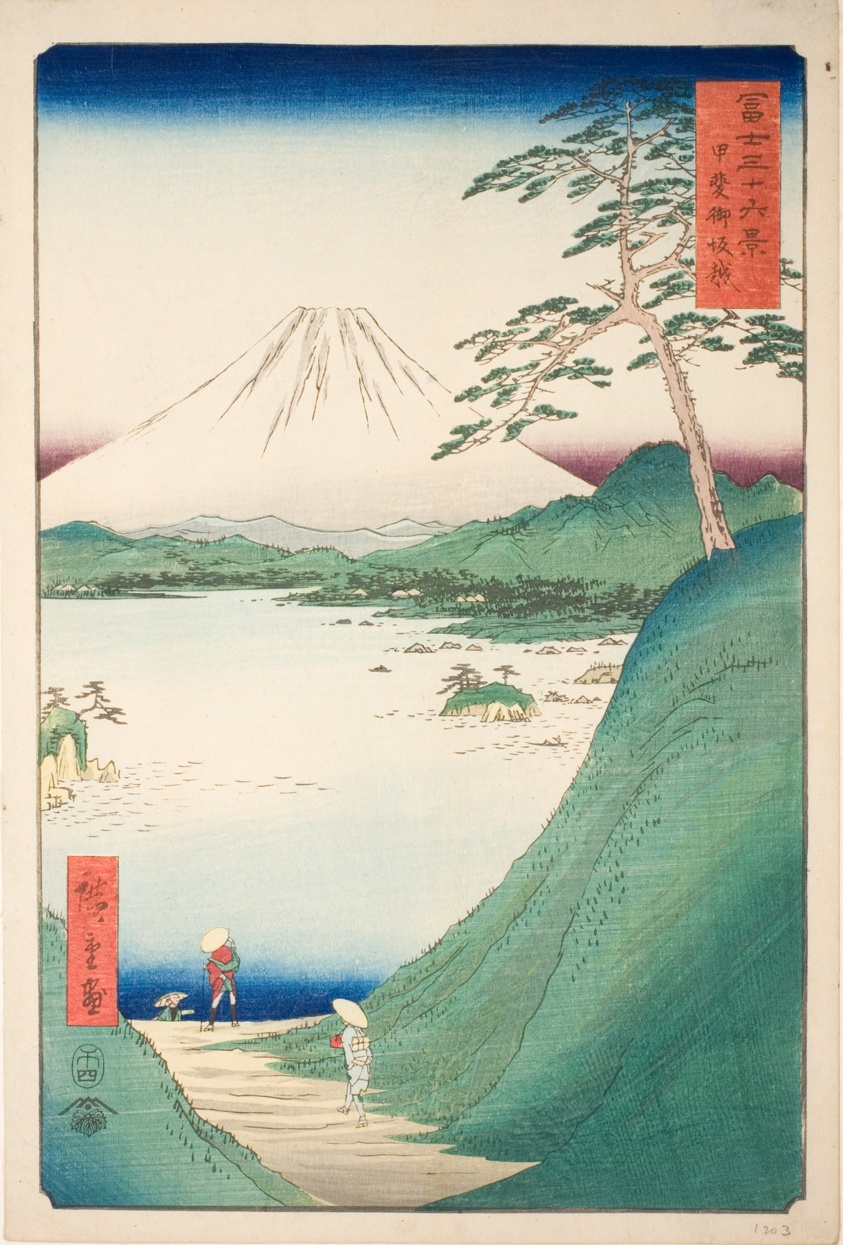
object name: Print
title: Misaka Pass in Kai Province (Kai Misakagoe), from the series "Thirty-six Views of Mount Fuji (Fuji sanjurokkei)"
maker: Utagawa Hiroshige 歌川 広重; Japanese, 1797-1858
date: 1858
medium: Color woodblock print; oban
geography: Japan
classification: woodblock print; print; asian art